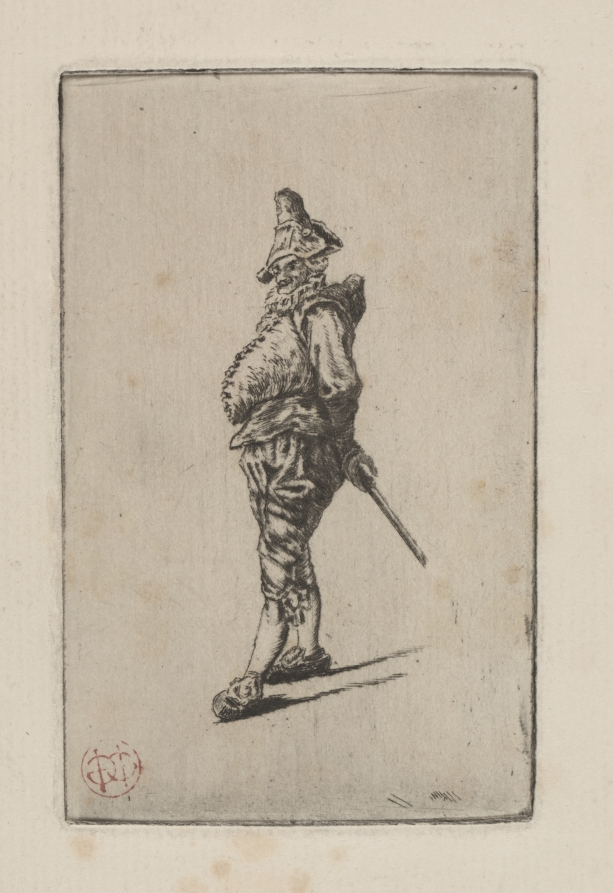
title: Punchinello, after Meissonier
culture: France, 19th century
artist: Henri Charles Guérard (French, 1846–1897)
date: 1876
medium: etching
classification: Print